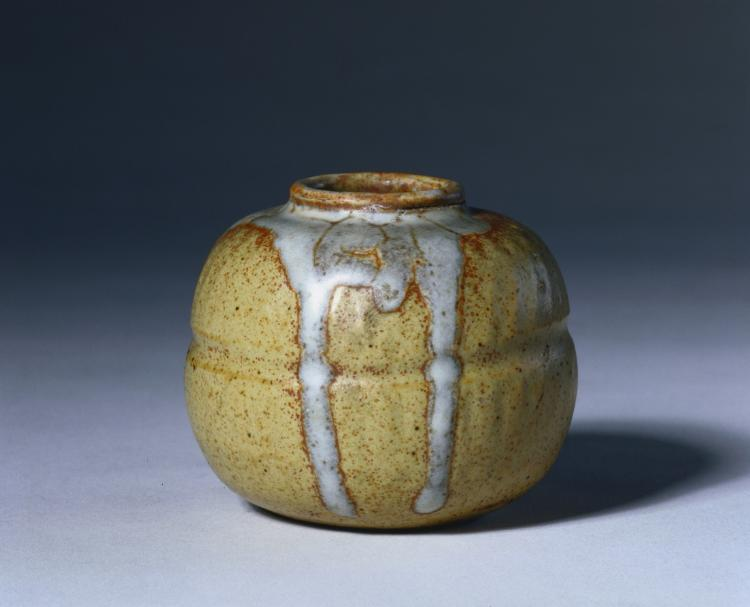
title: Small Pot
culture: France, early 20th Century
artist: Georges Hoentschel (French, 1855–1915)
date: c. 1900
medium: earthenware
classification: Ceramic